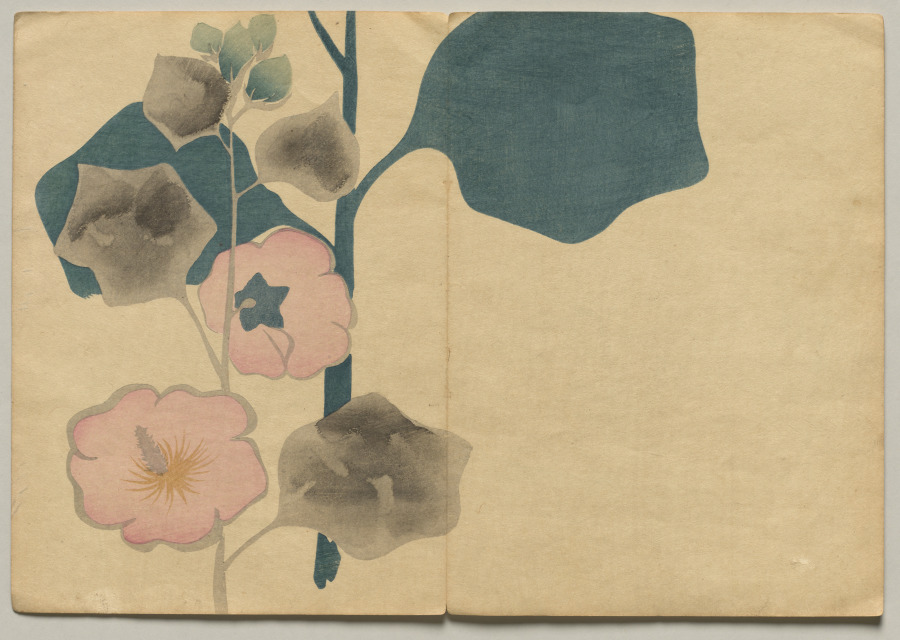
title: Scene from The Kōrin Picture Book (Volume 2)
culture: Japan, Edo period (1615–1868)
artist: Nakamura Hōchū (Japanese, d. 1819)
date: 1800s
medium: color woodblock printed book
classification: Bound Volume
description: Ogata Korin (1658-1716) was one of the most admired artists of Rimpa, or "decorative school painting." These books by the charming later-generation Rimpa artist Hochu record Korin's inventive designs.